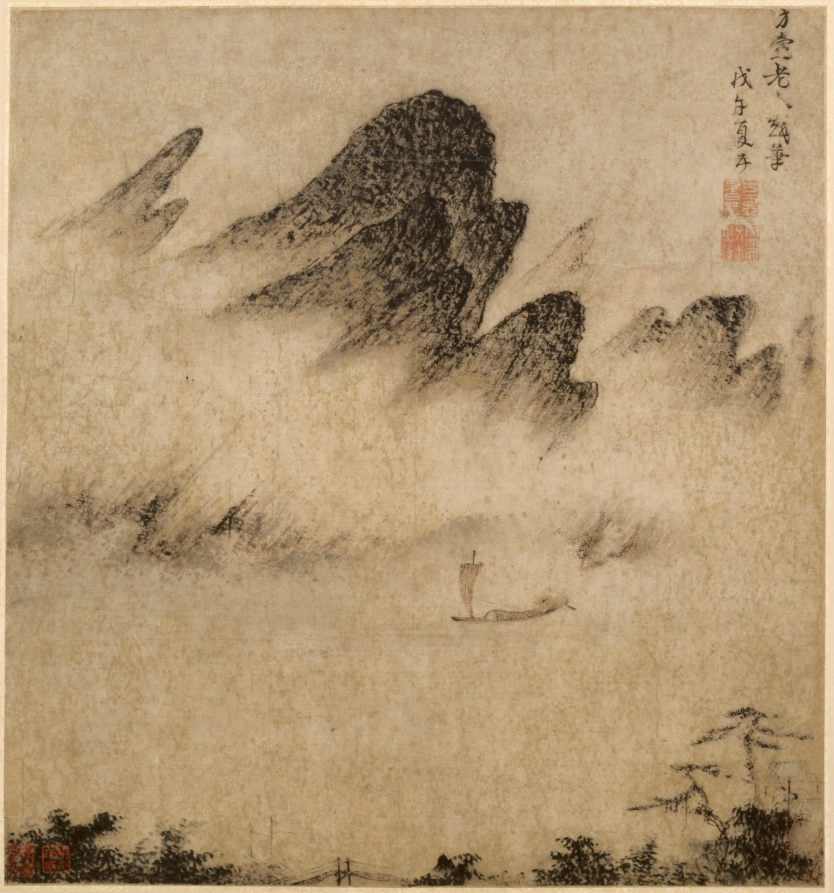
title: Landscape Ink-Play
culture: China, Yuan dynasty (1271-1368)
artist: Fang Congyi (Chinese, active c. 1340–80)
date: 1300s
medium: hanging scroll; ink and color on paper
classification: Painting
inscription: Inscription and 2 seals in the upper right. 2 complete seals and 1 partial in the lower left.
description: The painter created a paradoxical juxtaposition of the boat serenely sailing against the turbulent onrushing movement of the towering mountains in the background.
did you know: Fang Congyi was a painter and a Daoist priest.